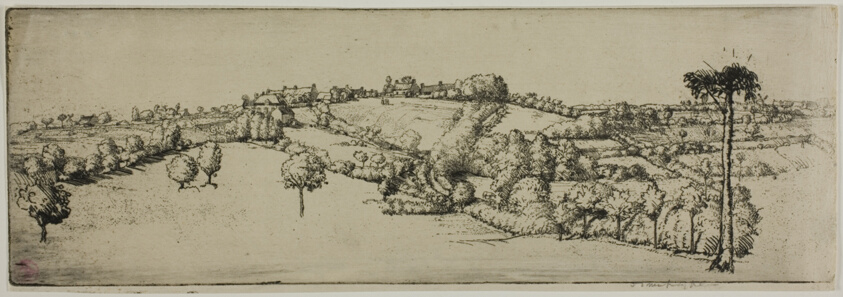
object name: Print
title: Landscape, Brittany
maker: Donald Shaw MacLaughlan (American, born Canada, 1876-1938)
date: 1907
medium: Etching in black on cream wove paper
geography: United States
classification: etching; print; prints and drawing